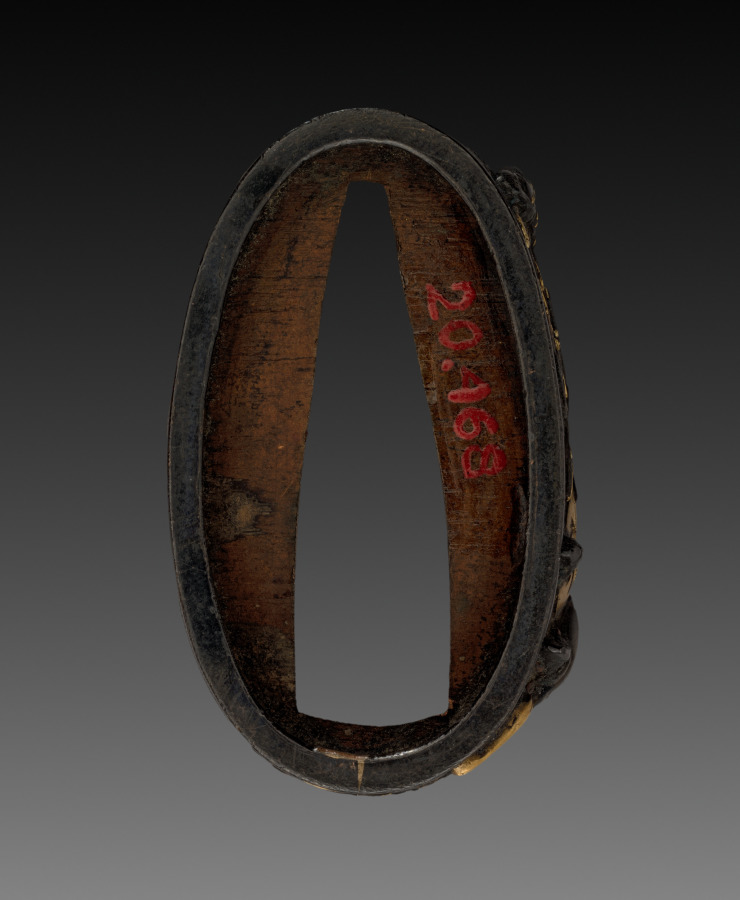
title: Sword-Hilt Collar (Fuchi)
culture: Japan, Edo period (1615–1868)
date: 1700–1850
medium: shakudo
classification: Arms and Armor